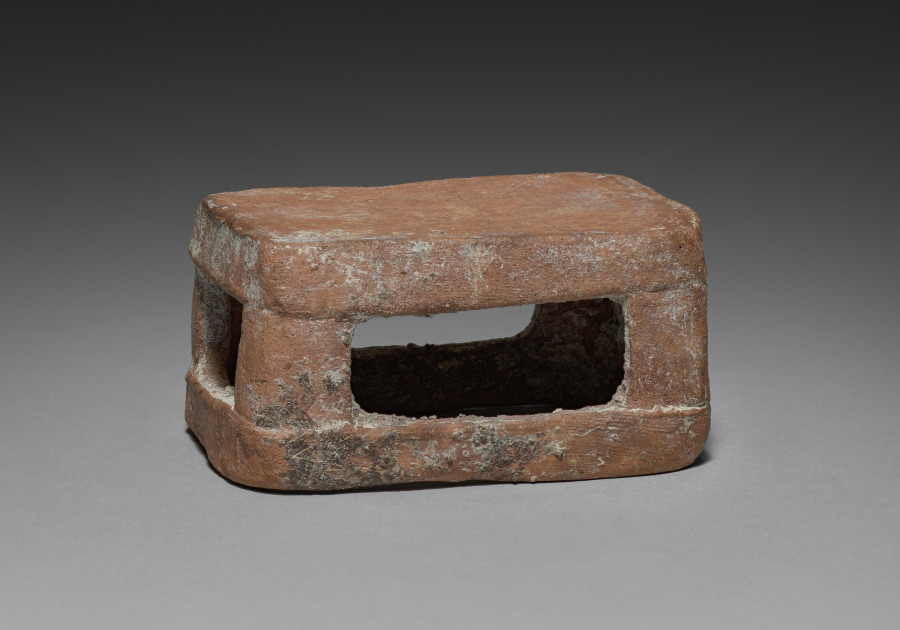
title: Seated Lord with Removable Headdress: Stool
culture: Mesoamerica, Maya, probably Jaina Island, Late Classical period, 7th-9th century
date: 600–800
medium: ceramic and slip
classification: Ceramic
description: The major Maya grave offerings on Jaina Island were ceramic figurines that depict deities and humans in a variety of roles. The stool belongs to a seated figure who represents a male, perhaps another warrior, who wears a huge zoomorphic headdress.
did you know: It is estimated that some 20,000 people were buried on the tiny island of Jaina over a 500-year period.